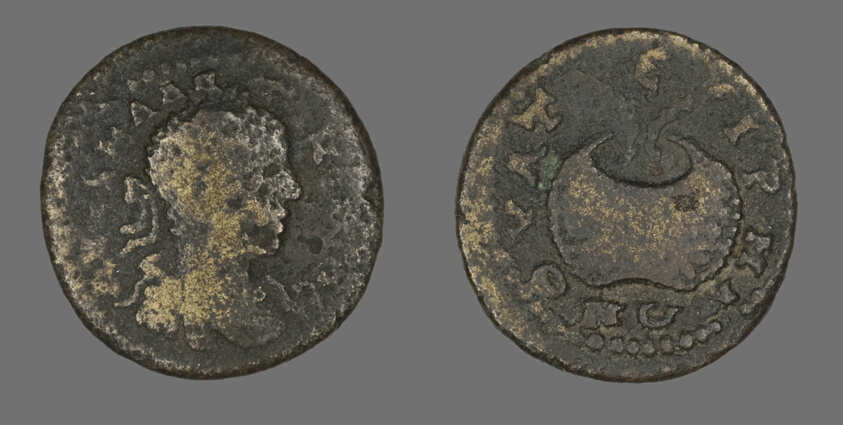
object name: Coin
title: Coin Portraying Emperor Elagabalus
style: roman (ancient, style or period), ancient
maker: Roman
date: 218-222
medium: Bronze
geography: Roman Empire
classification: coin; ancient art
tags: portrait